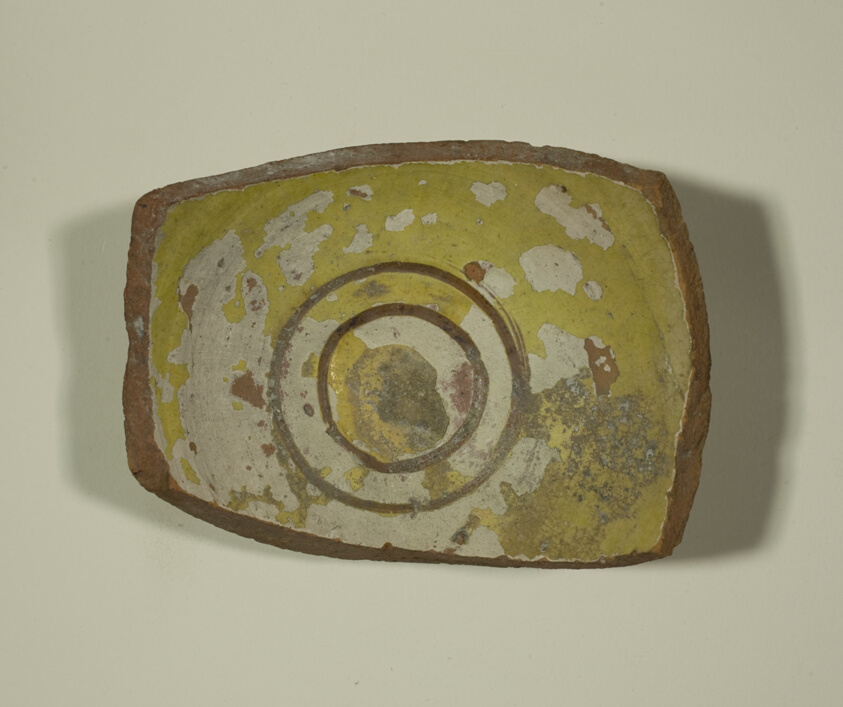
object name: Decorative Arts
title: Fragment of a Bowl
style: byzantine, european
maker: Byzantine (Greece, Thessaloniki)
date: 13th-14th century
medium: Ceramic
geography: Byzantine Empire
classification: fragment; ceramics; vessel; bowl; asian art; decorative arts